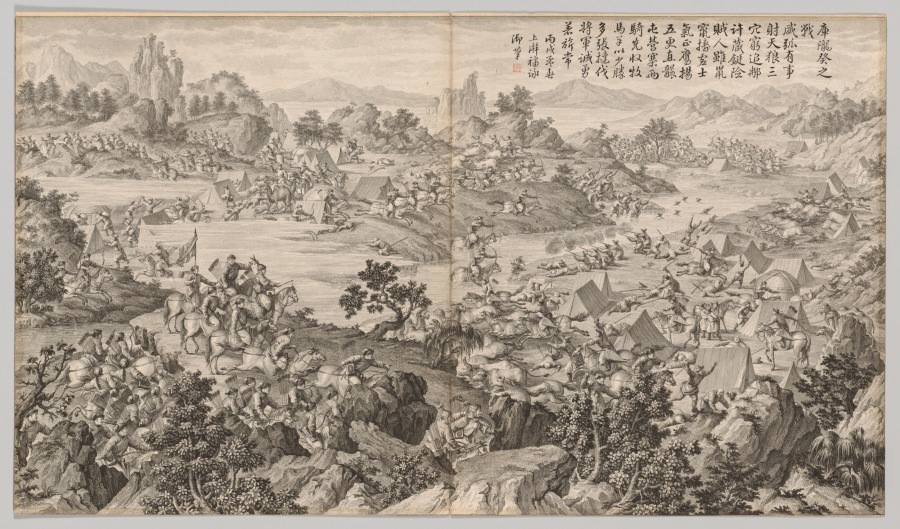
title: Battle of Kulongkui: from Battle Scenes of the Quelling of Rebellions in the Western Regions, with Imperial Poems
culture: China, Qing dynasty (1644–1911), Qianlong reign (1736–95)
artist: Jean Damascene Sallusti (Italian, d. 1781)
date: c. 1765–74; poem dated 1766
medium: etching, mounted in album form, 16 leaves plus two additional leaves of inscriptions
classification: Print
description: This set of etchings was commissioned by Emperor Qianlong to record in pictorial terms the courage of his generals and soldiers in quelling the rebellions in the Western Regions. Qianlong added his own poem to each of the etchings, indicating his appreciation and pride in this demonstration of military might. "Western Regions" refers to the present-day Xingjiang province, often described in Western writing as "Central Asia."